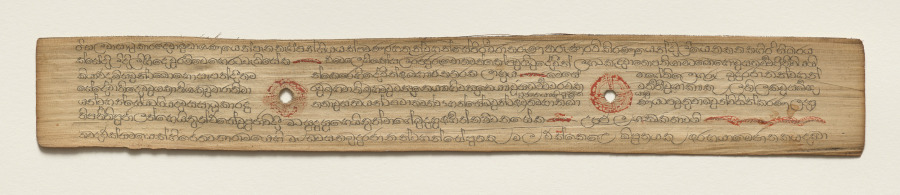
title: Leaf from a Buddhist Manuscript (verso)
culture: Sri Lanka, Singhalese, Late 17th century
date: c. 1700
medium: fiber paper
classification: Manuscript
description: Palm leaf material is still used for manuscripts in Sri Lanka. The palm leaves are prepared first by boiling them, drying them in the sun, and then rubbing them with oils. Scribes then use a metal stylus to incise the text. Then charcoal powder is wiped across the pages, filling in only the inscribed lines.